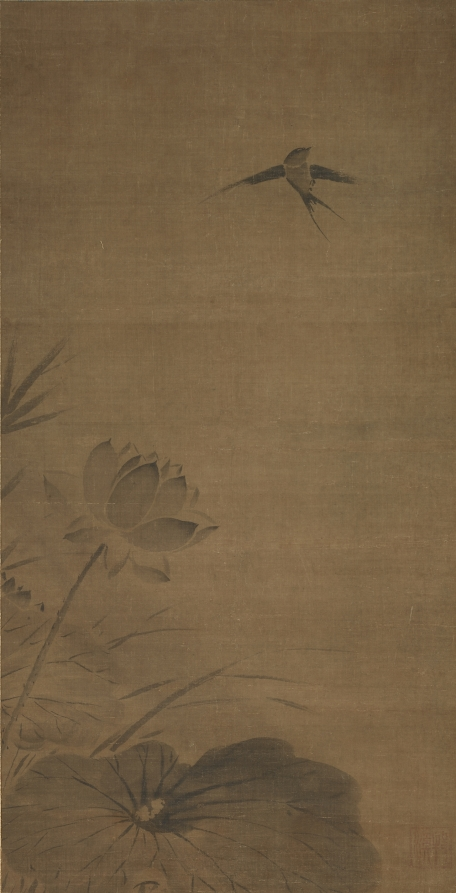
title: Swallow and Lotus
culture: China, Southern Song dynasty (1127–1279)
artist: attributed to Fachang Muqi (Chinese, 1220–1280)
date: mid-1200s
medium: Hanging scroll; ink on silk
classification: Painting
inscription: Seal of Mu Qi in lower right corner.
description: A swallow with wings spread in flight soars above a lush lotus blossom, which rises above two broad leaves and grassy shoots.